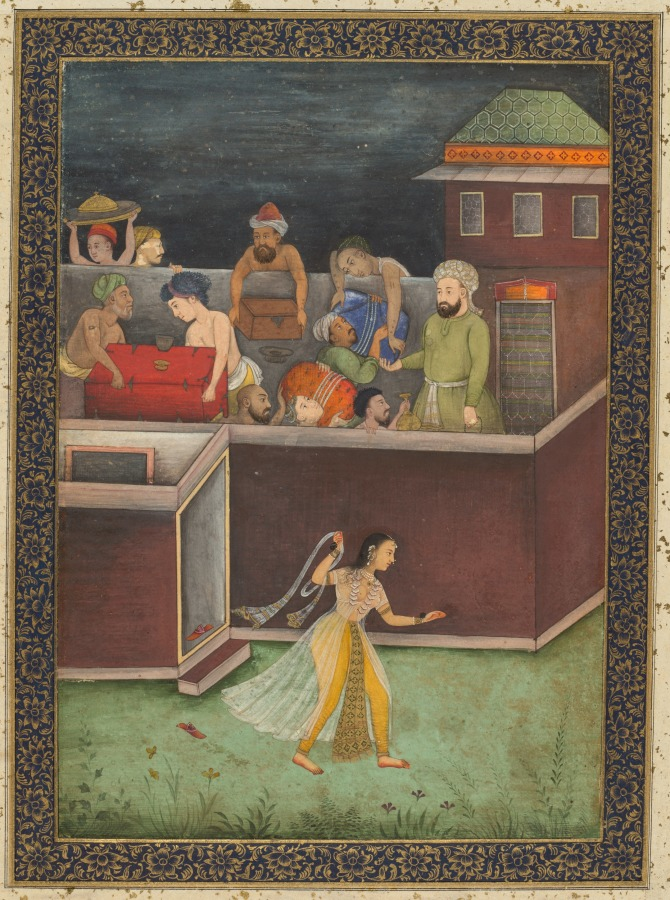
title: A House Burgled at Night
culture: Mughal India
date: c. 1700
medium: Gum tempera and gold on paper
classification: Painting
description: In this night scene a band of robbers have climbed over the walls of a Mughal house and, from a courtyard, are successfully carrying out the possessions of its owners while a lady flees through the door. The speed of her movement is expressed in the swinging motion of her diaphanous skirt and the scarf clutched in her hand, as well as by the shoes abandoned on the ground in her haste. This depiction of unruly behavior and its effects are perhaps an expression of the violent succession of emperors that threw the Mughal court into distress at the beginning of the 18th century.